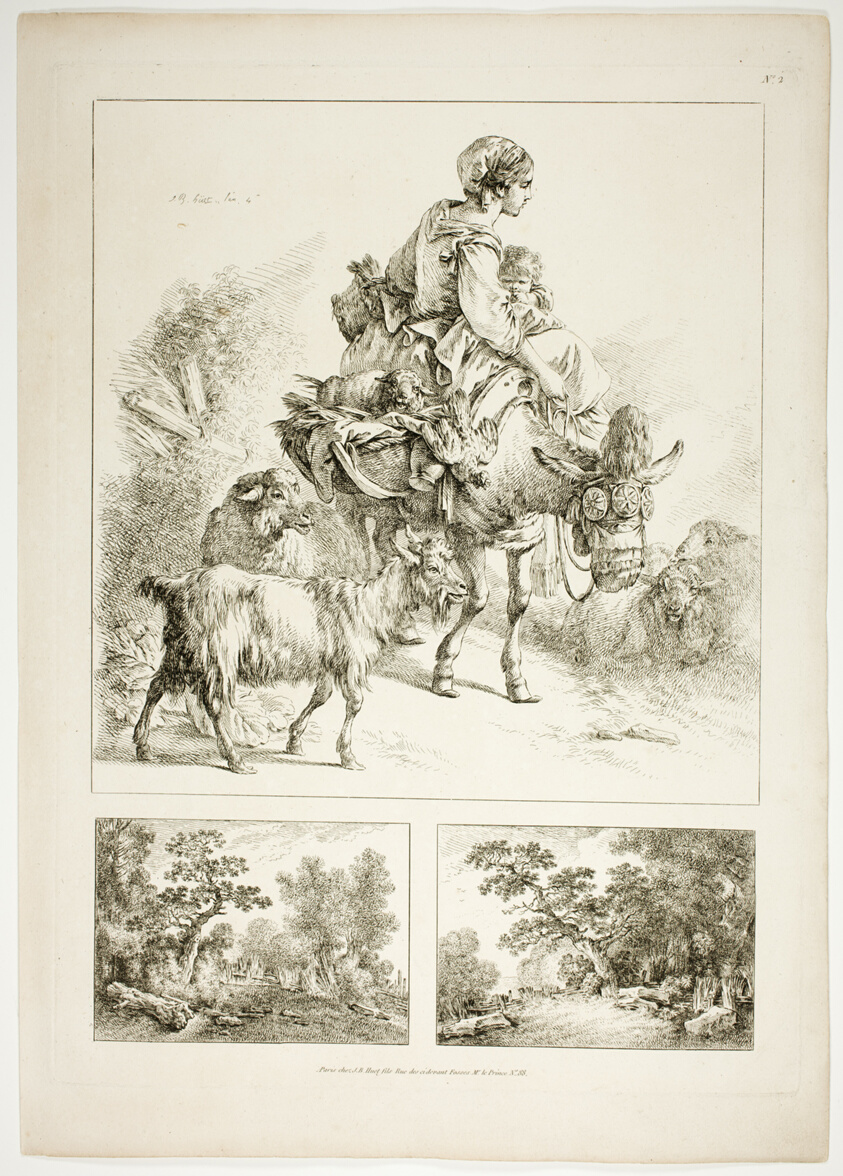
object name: Print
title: Plate Two of 38 from Oeuvres de J. B. Huet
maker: Jean Baptiste Huet (French, 1745-1811)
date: 1796–99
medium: Etching on paper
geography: France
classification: etching; print; prints and drawing